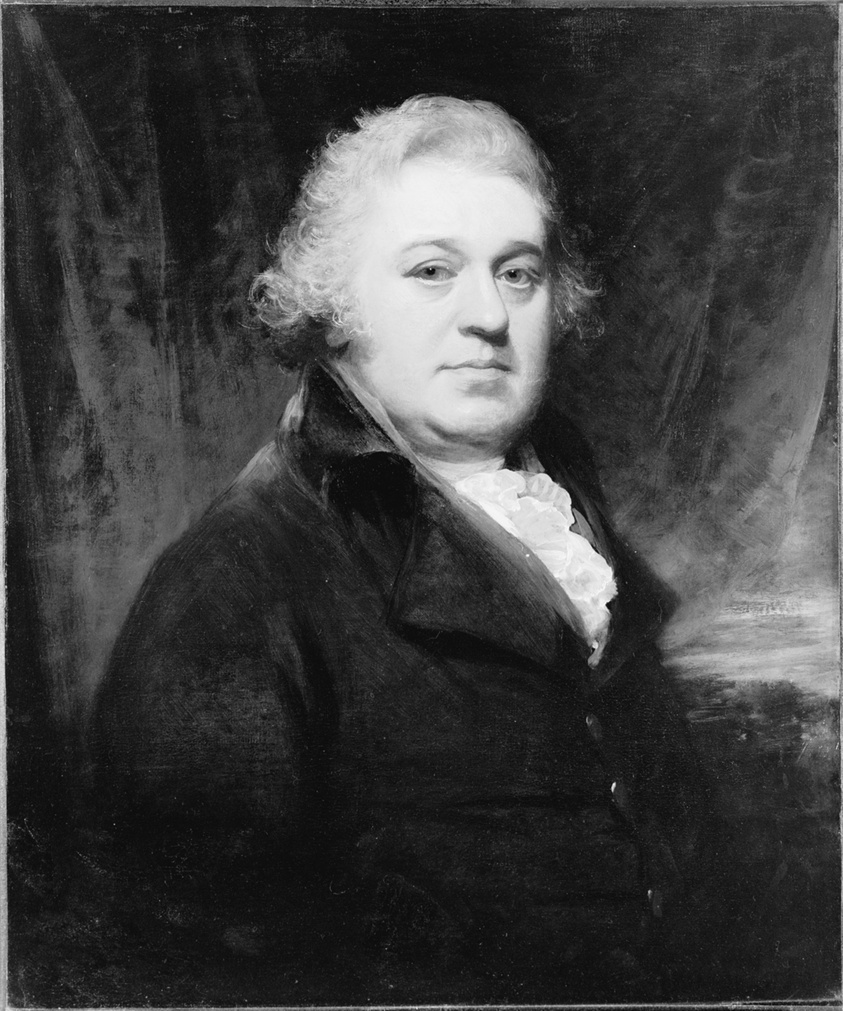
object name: Painting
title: Mark Pringle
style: 18th Century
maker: Sir William Beechey (British, 1753-1839)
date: c. 1797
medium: Oil on canvas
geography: England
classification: oil on canvas; oil; paint; portrait; painting; european painting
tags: portrait, men, man, portraits: European subject